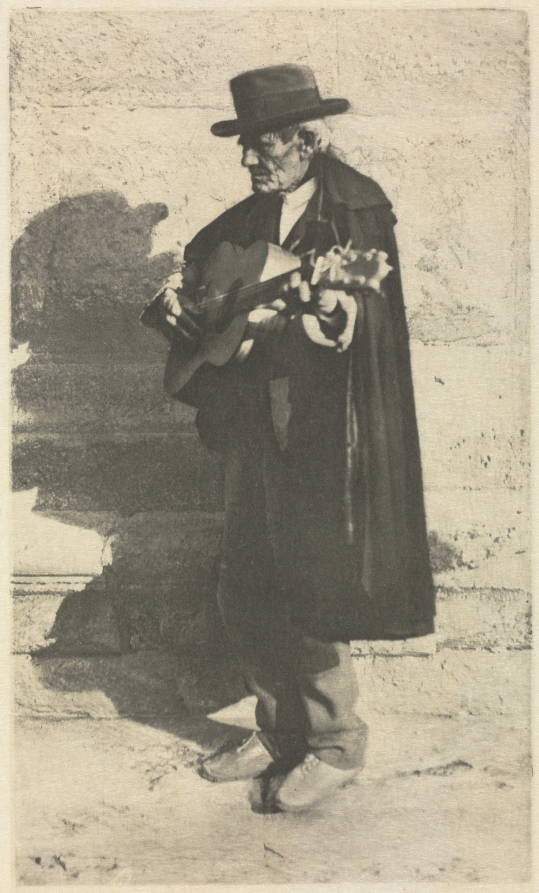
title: Camera Work: A Blind Musician - Granada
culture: England, 20th century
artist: J. Craig Annan (British, 1864–1946)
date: 1914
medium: photogravure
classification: Bound Volume